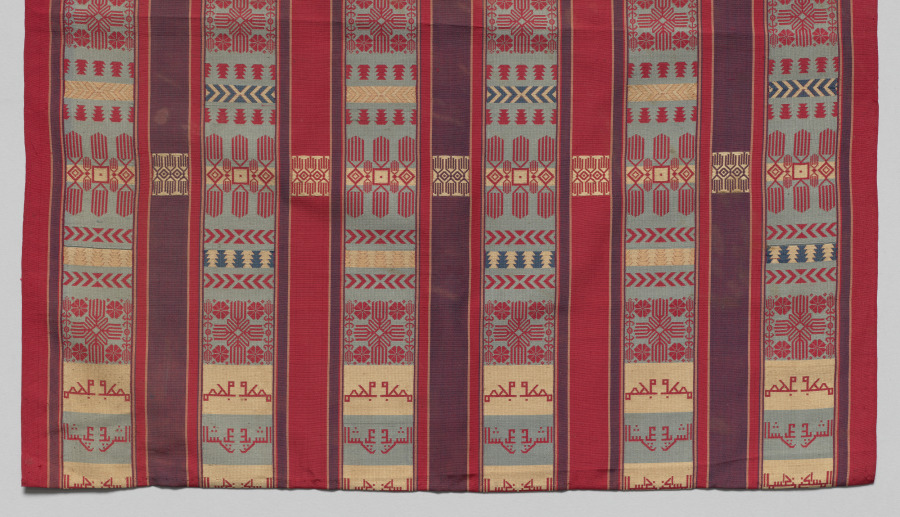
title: Panel from a Head Covering (‘Ajar)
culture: Africa, North Africa, Tunisia, probably Testour or Tunis, Tunisian weaver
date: probably 1800s or early 1900s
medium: Silk, metal, dye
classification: Textile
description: This panel was part of an urban Tunisian woman’s head-covering (‘ajar). Two such panels flanked a face-obscuring black panel. Such luxurious garments of seclusion were once reserved for elites. The decorative panels draped down when worn, showing off the finely woven motifs and demonstrating the wearer’s family wealth. Arranged in bands, motifs include stylized trees (or protective hands), flowers, eight-pointed stars, and geometric designs. The mirrored Kufic (squared Arabic script) lettering in teal is likely the name of the weaver or panel owner. Weavers with Muslim Andalusian (southern Spanish) heritage originally made these, drawing from Andalusian and Turkish motifs; later, workshops in Tunis produced them.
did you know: The khamsah (خمسة), an open five-fingered hand, is a protective motif. It is woven in red in multiple ways on this panel.